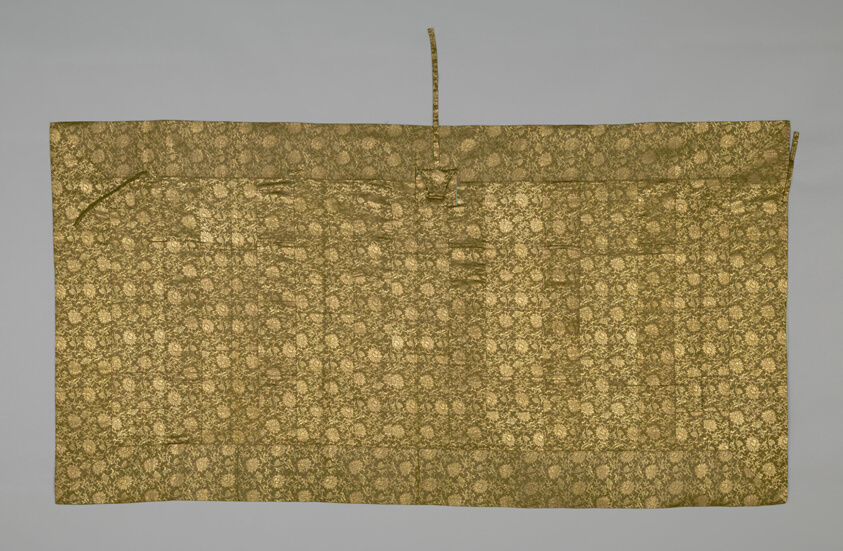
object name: Textile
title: Kesa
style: edo (japanese period)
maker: Japan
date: 18th century, Edo period (1615–1868)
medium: Silk and gilt-paper strip; twill and satin weaves with supplementary patterning wefts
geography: Japan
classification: textile; weaving; liturgical - buddhist; costume